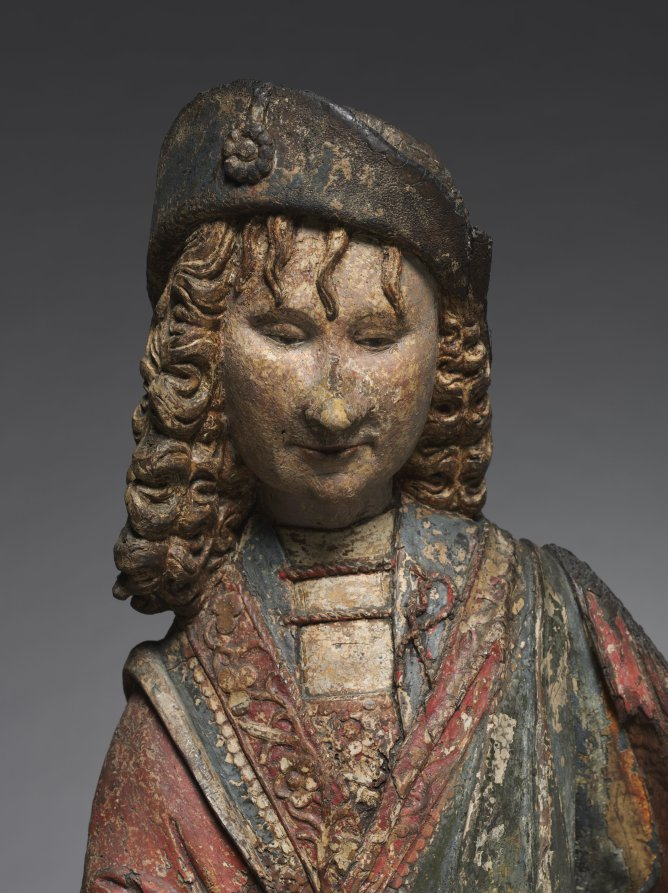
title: Saint Martin of Tours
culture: Northeast France or Flanders, 15th century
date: c. 1480–1500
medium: polychromed walnut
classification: Sculpture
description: According to tradition, Saint Martin was born during the reign of Constantine the Great (306–37 CE) and served as a member of the Roman cavalry in Gaul. There he earned a reputation for humility and boundless charity. During the severe winter of 322 CE at Amiens, Martin's compassion for others led him to divide his cloak with his sword, and to give half to a poor, naked beggar. This event, along with Martin's subsequent vision of the beggar as Christ, eventually led to the saint's widespread popularity throughout medieval Europe. Saint Martin was particularly venerated in the city of Tours where he served as bishop, where his tomb is located, and of which he remains the patron saint.